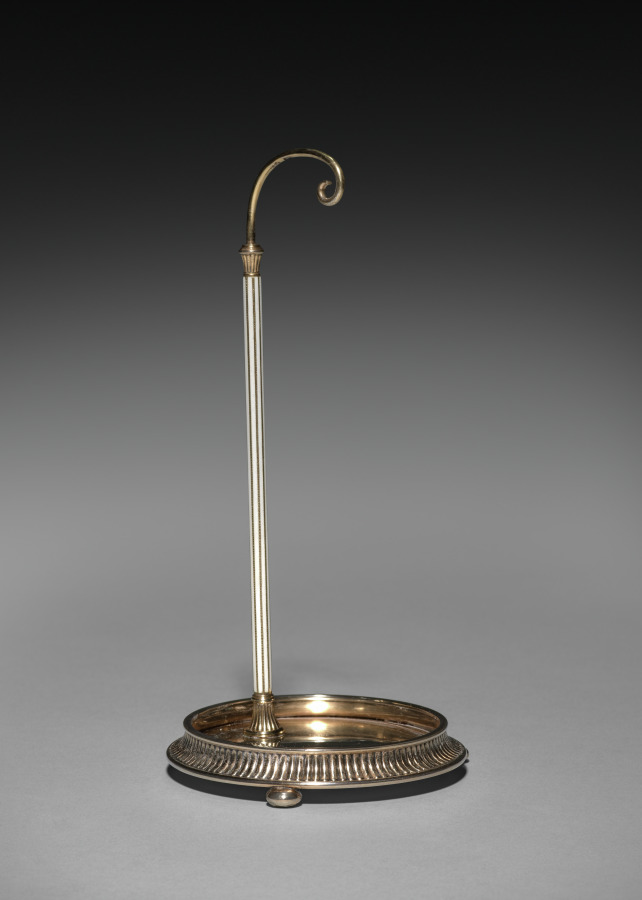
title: Perch for the Parrot on a Perch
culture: Russia, St. Petersburg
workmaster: Mikhail Evlampievich Perkhin (Russian, 1860–1903)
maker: House of Fabergé (Russian, 1842–1918)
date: 1896–1903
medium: Silver, enamel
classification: Miscellaneous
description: This frame is meant to hold a hardstone parrot sitting on a perch. In creating luxurious accessories for a desk or tabletop, Fabergé often used native hardstones such as multicolored agate and jasper, green nephrite, pink rhodonite, and rock crystal found in the Ural Mountains of western Russia. By paying careful attention to the unique colors and textures of the stones, Fabergé and his craftsmen brought them to life, turning milky agate into a begging poodle or green and black jasper into a parrot sitting on a perch. The use of native materials also promoted Russian nationalism, which appealed greatly to the tsar and his family.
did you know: This perch is part of a figure of a parrot sitting on a perch.